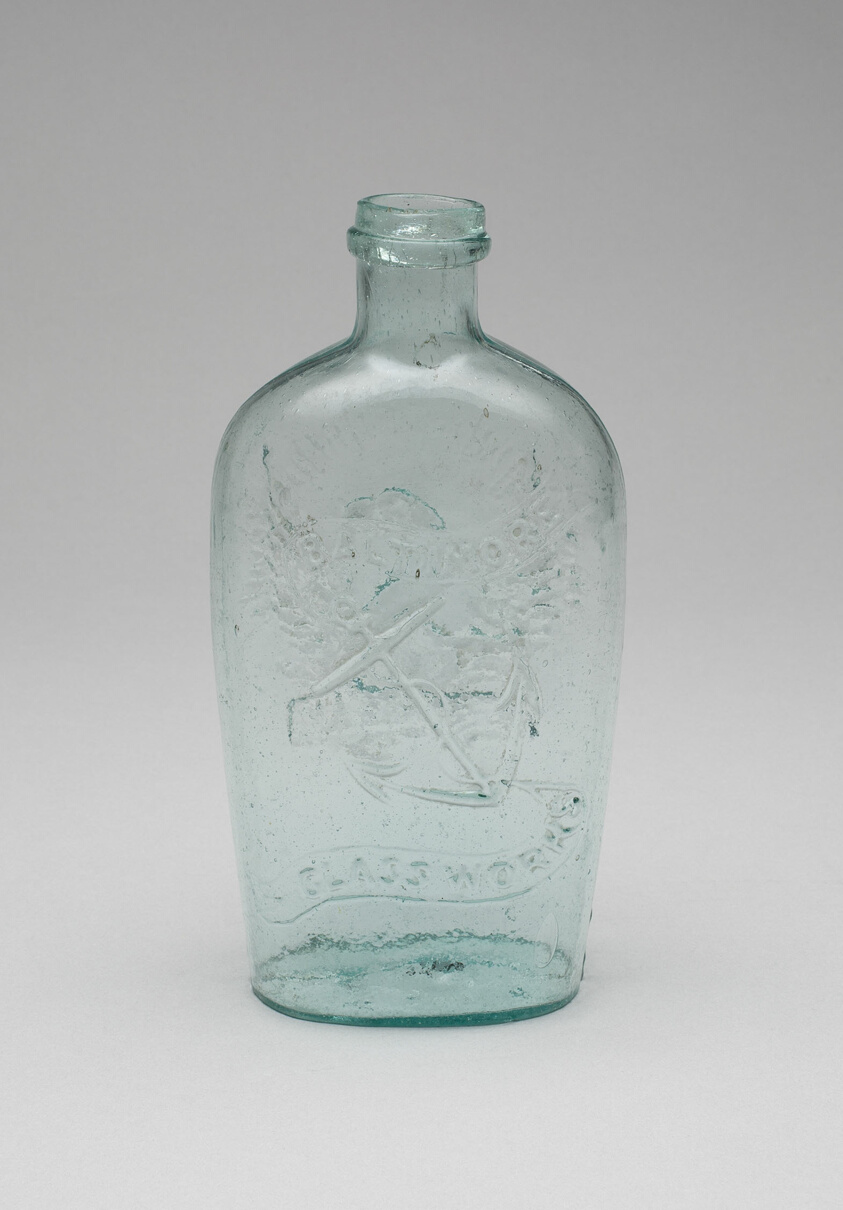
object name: Glass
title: Flask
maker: Baltimore Glass Works; American, 1800–1870; Baltimore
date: c. 1850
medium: Glass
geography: Baltimore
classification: flask (bottle); american decorative arts; glass (object genre); decorative arts